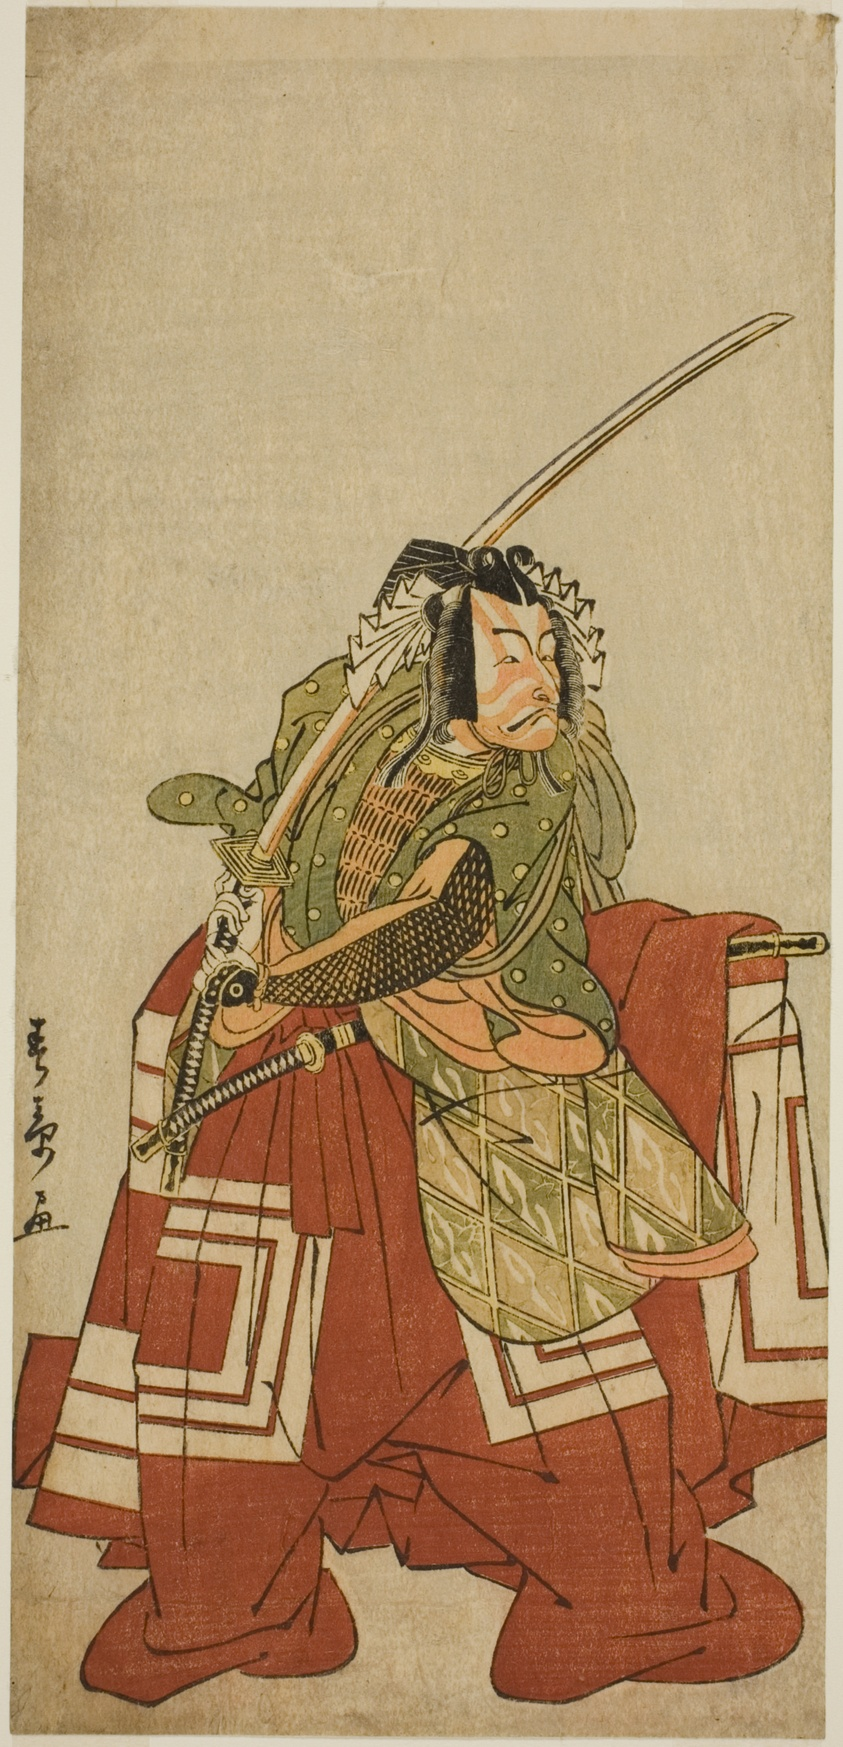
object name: Print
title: The Actor Ichikawa Danjuro V as Arakawa Taro in the Play Date Nishiki Tsui no Yumitori, Performed at the Morita Theater in the Eleventh Month, 1778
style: Japanese (culture or style)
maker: Katsukawa Shunsho 勝川 春章; Japanese, 1726-1792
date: c. 1778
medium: Color woodblock print; hosoban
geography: Japan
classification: woodblock print; print; asian art